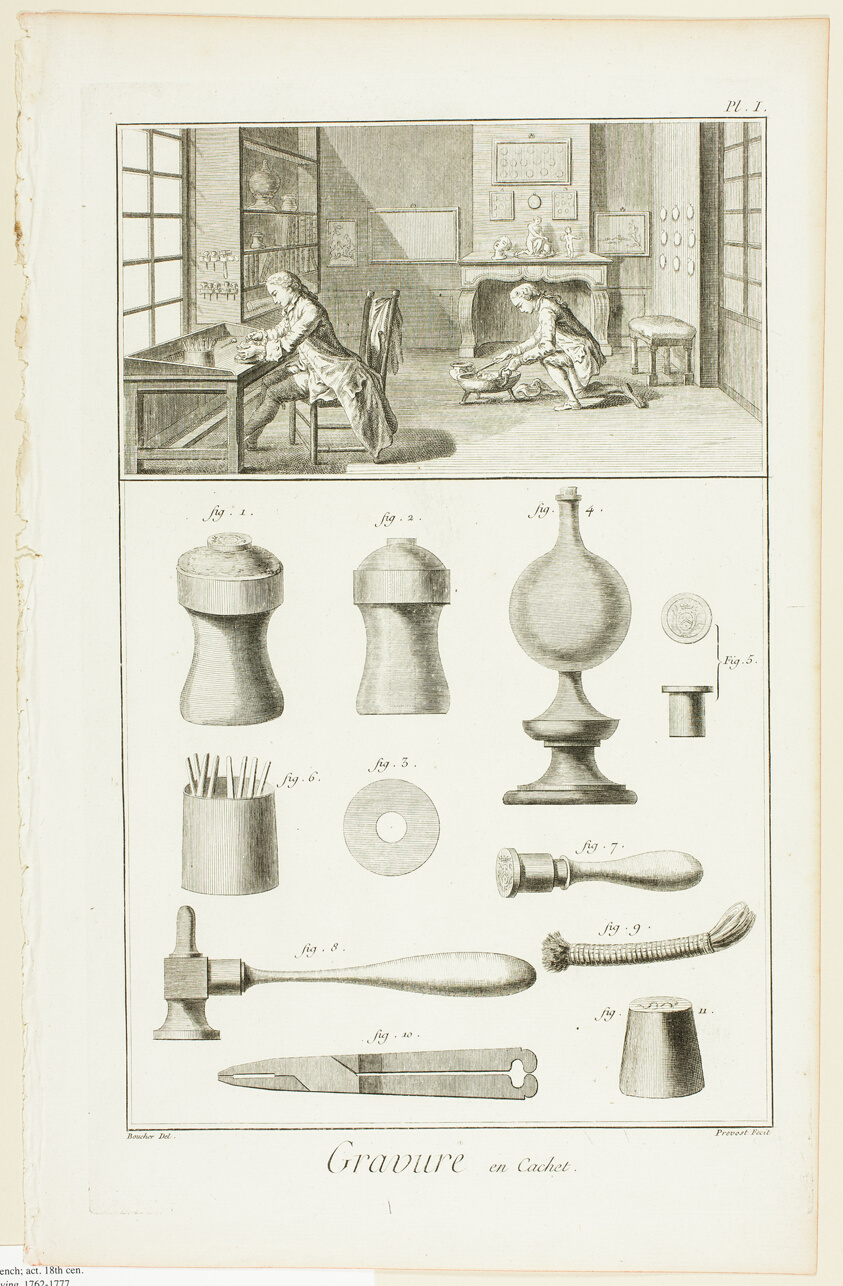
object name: Print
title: Seal Engraving, from Encyclopédie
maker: Benoît-Louis Prévost (French, c. 1735-1809); after Antoine-Gaspard Boucher d'Argis (French, 1708-1791); published by André le Breton (French, 1708-1779), Michel-Antoine David (French, c. 1707-1769), Laurent Durand (French, 1712-1763), and Antoine-Claude Briasson (French, 1700-1775)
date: 1762/77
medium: Engraving on cream laid paper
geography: France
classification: etching; print; prints and drawing